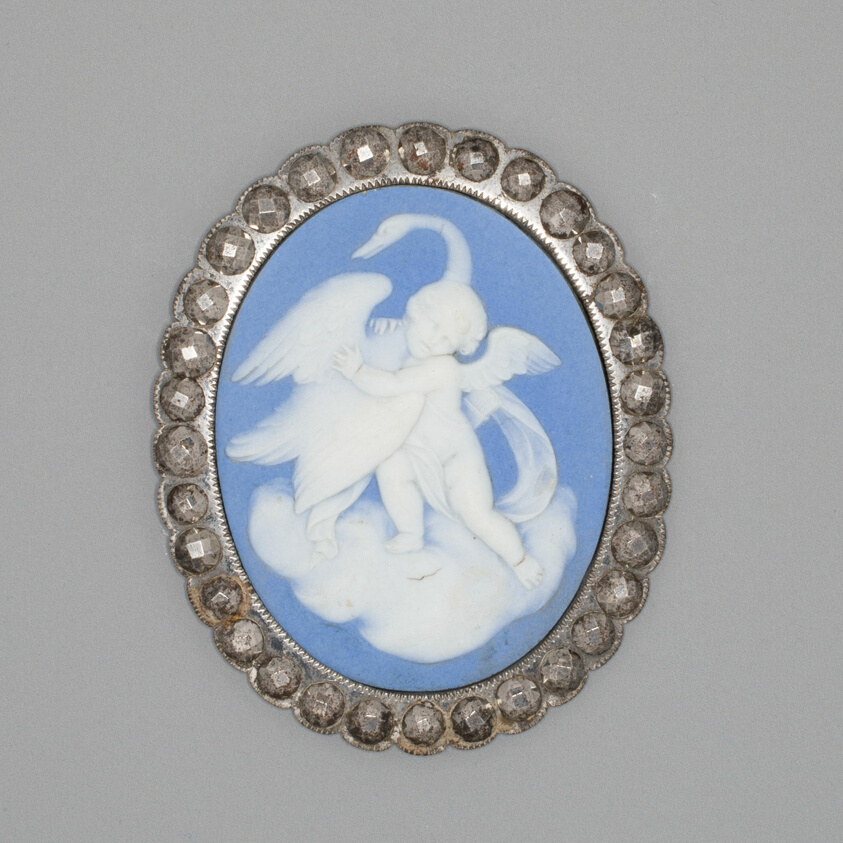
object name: Ceramics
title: Medallion with Cupid and Swan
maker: Wedgwood Manufactory (England, founded 1759)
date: Late 18th century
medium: Stoneware (jasperware)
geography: Burslem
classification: sculpture; stoneware; european decorative arts; ceramics